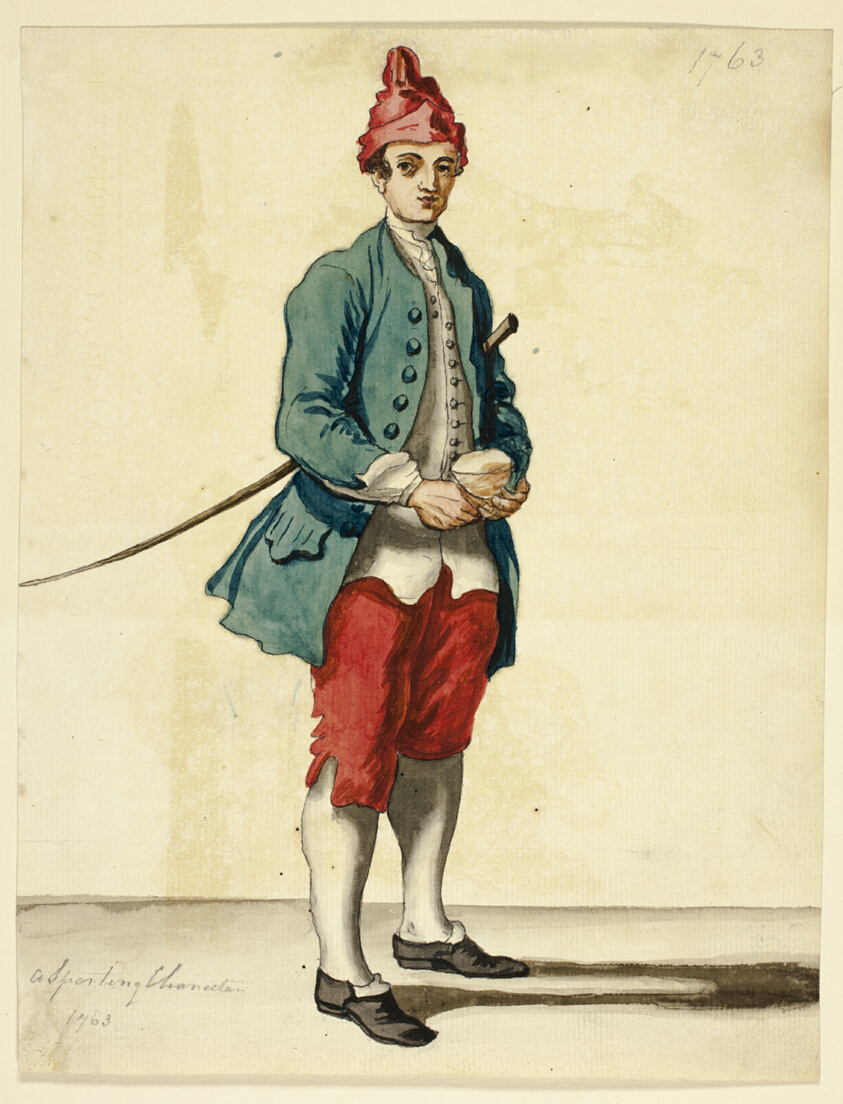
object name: Drawing and Watercolor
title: A Sporting Character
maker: Attributed to David Allan; Scottish, 1744-1796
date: 1754-1796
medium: Pen and gray ink with brush and watercolor, on cream laid paper, tipped onto cream wove card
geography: Scotland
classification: watercolor; drawings (visual works); prints and drawing